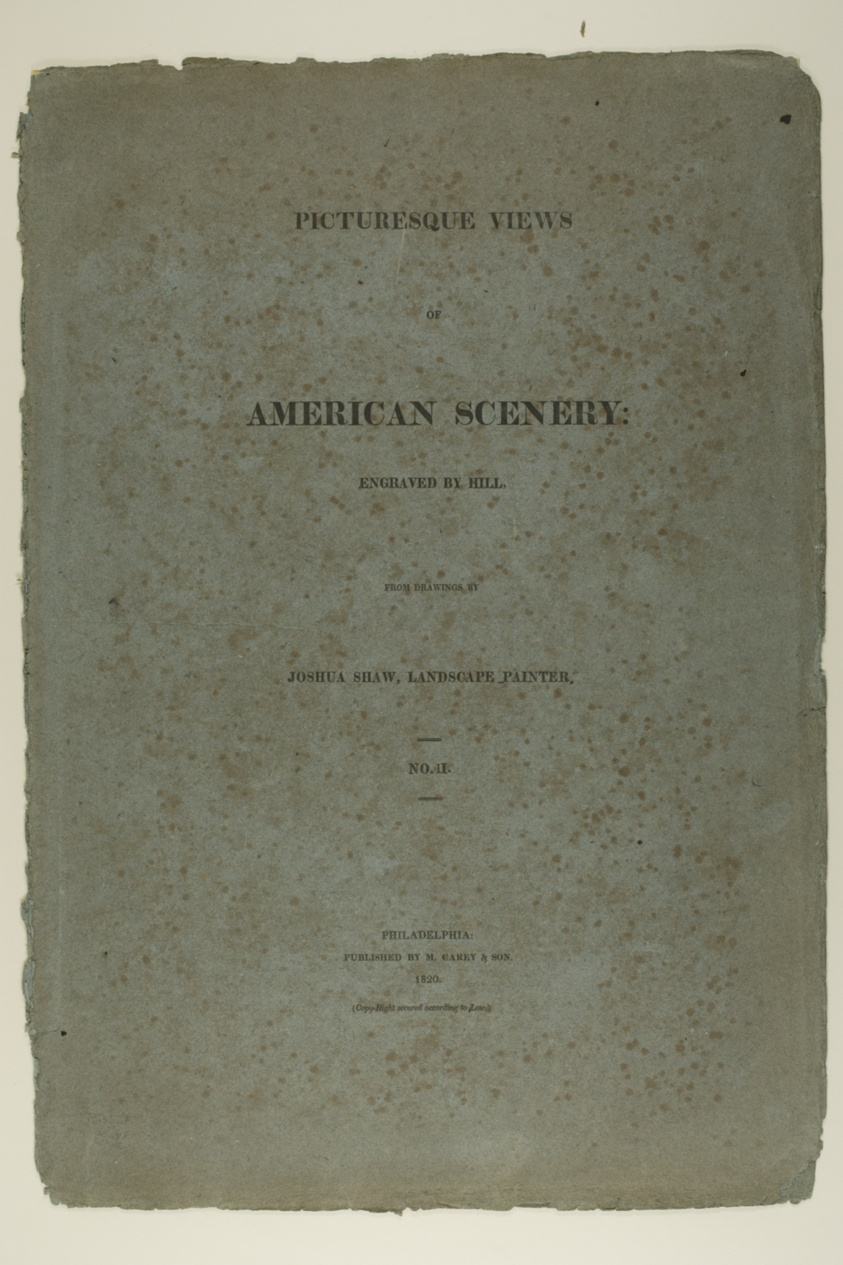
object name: Print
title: Portfolio Cover for Picturesque Views of American Scenery, No. II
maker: John Hill (American, 1770-1850); after Joshua Shaw (American, born England, c. 1777-1860); published by Matthew Carey & Son (American, active 1795-1821)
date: 1819/21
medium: Letterpress on blue wove paper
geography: United States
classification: print; prints and drawing